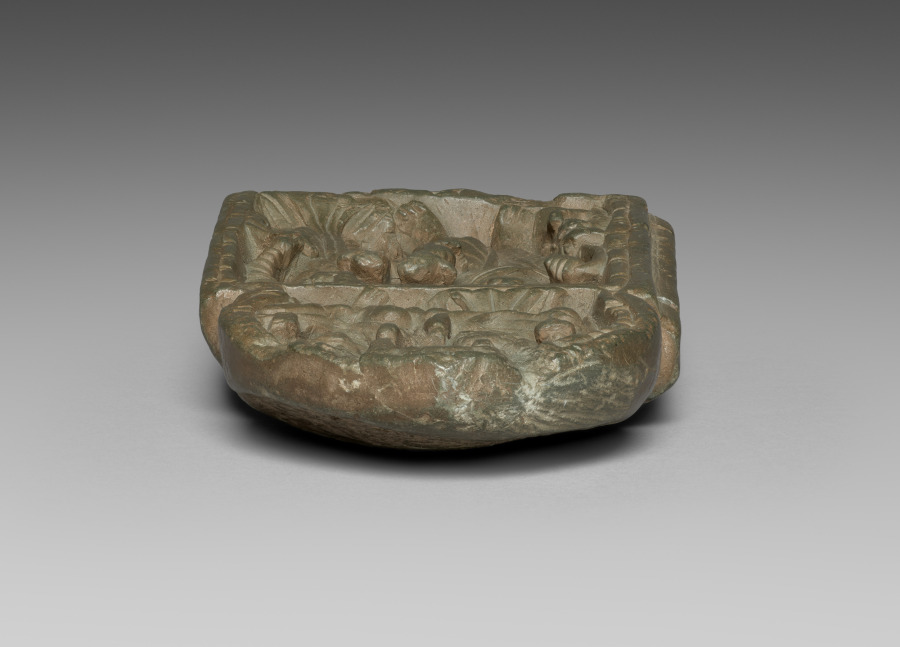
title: Section from a Portable Shrine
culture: Pakistan, Gandhara, Kushan period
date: 100s CE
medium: gray schist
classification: Sculpture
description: Figures of deities who protect children are featured in this relief carving. A form of Skanda holding a bird and a flower stands next to a regal yakshi with pointed rodent or elephant ears. A diminutive figure who may be a child is shown kneeling at his feet. Above, the six-headed mother goddess Shashthi sits next to Skanda, holding the spear.